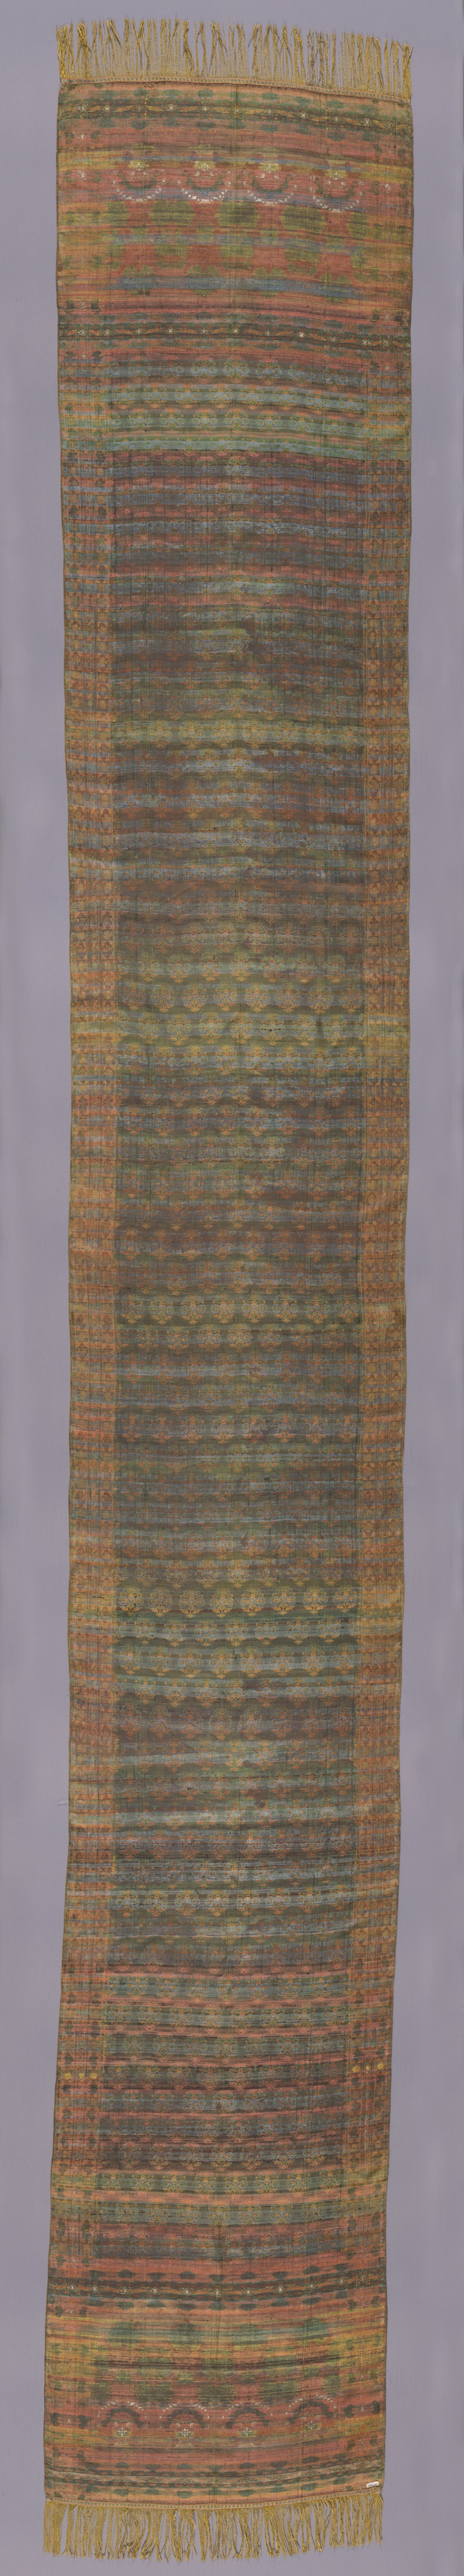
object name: Costume and Accessories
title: Man's Waist Sash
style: 18th Century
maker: Made in Iran or Poland for the Polish market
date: 18th century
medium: Silk compound weave, with applied silk and metal fringe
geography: Iran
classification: costume; weaving; dress (garment); clothing; textile; costume accessory worn at waist or below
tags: floral motifs, flowers, vase, geometric, floral, rectangles, stripes, nobility